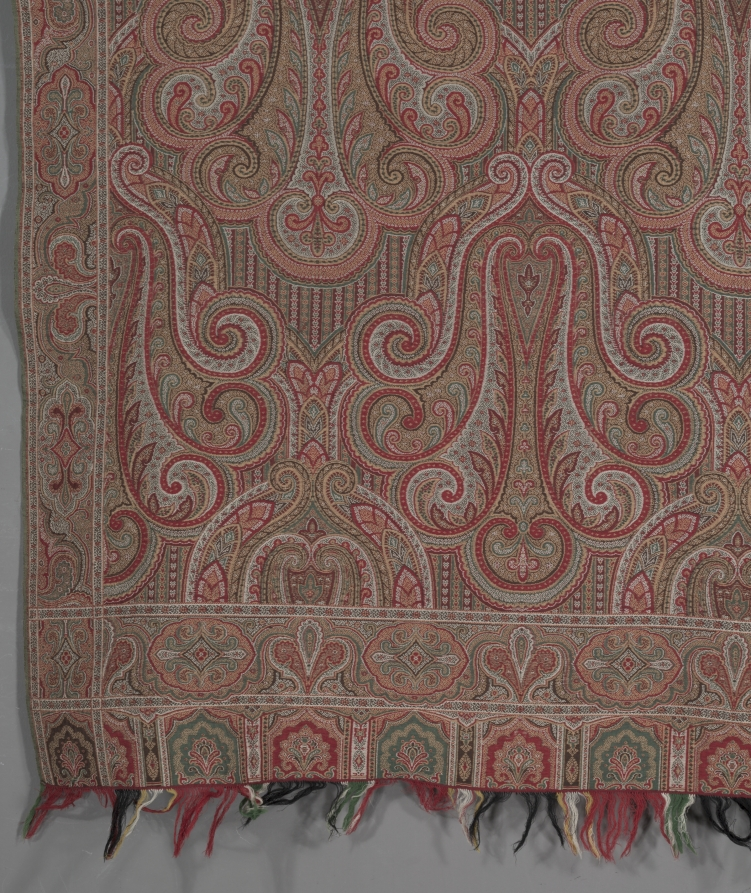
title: Square Reversible Shawl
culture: England, Norwich or France, Lyon or Scotland, Paisley, second half of 19th century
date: c. 1865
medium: cotton and wool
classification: Textile